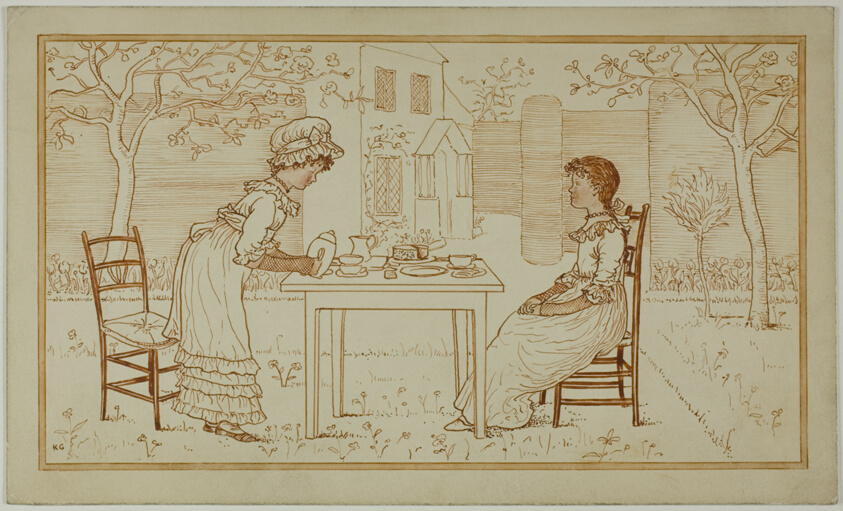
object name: Drawing and Watercolor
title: Tea Party for Two Outside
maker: Attributed to Kate Greenaway (English, 1846-1901); or an imitator of Kate Greenaway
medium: Pen and red-brown ink, with brush and red-brown wash, on cream wove card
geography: England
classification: pen and ink drawings; drawings (visual works); prints and drawing